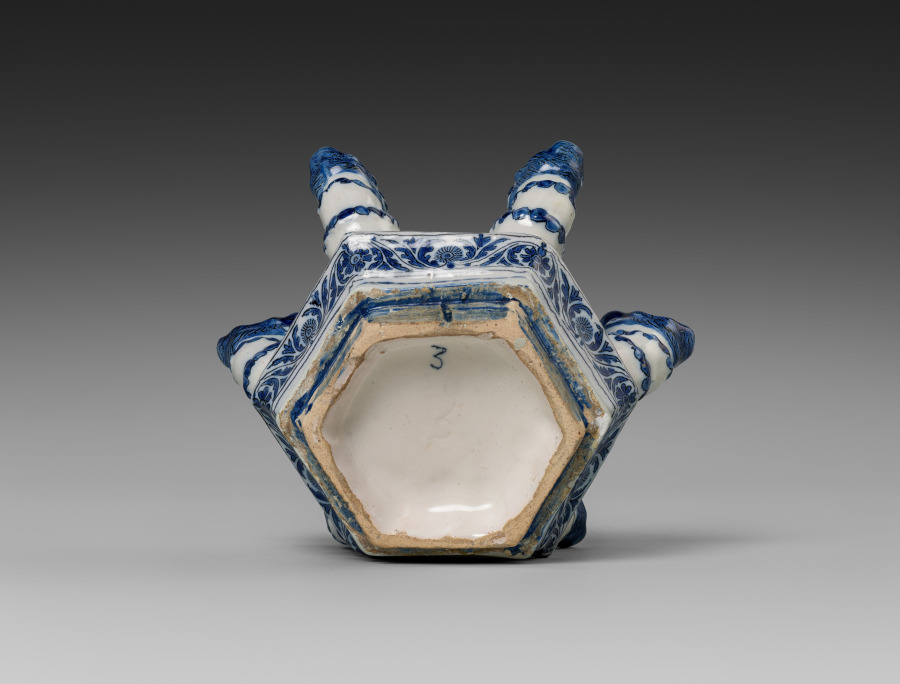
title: Fourth Tier for a Flower Pyramid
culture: Netherlands, Holland, Delft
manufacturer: Adrianus Kocx (Dutch, active 1686–1701)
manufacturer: De Grieksche A (The Greek A) Factory (Netherlands, 1658–1811)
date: c. 1690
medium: Tin-glazed earthenware, painted in blue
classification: Ceramic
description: Allegorical figures representing Faith, Hope, and Love decorate the base of this pyramid, on which rest six tiers with spouts where flowers can be placed. Flower pyramids are among the most complex and luxurious types of ceramics produced in Delft in the late 1600s. This example was made in the Greek A Factory, owned by Adrianus Kocx. During his tenure, the factory became the most prestigious of Delft potteries and received commissions from Queen Mary II, who ruled over England, Scotland, and Ireland together with her husband, William III. She contributed to the international spread of the fashion for Delft ceramics.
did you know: The iconic blue-and-white ceramics from Delft originated as an attempt to copy Chinese porcelain.